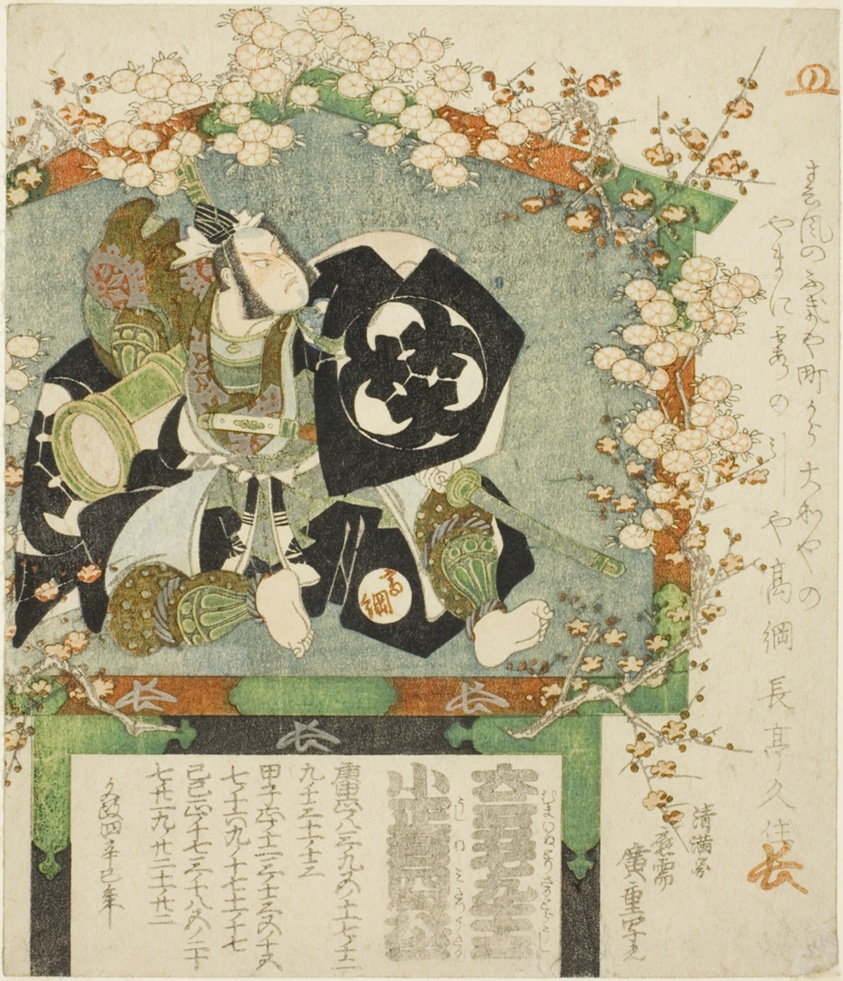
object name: Print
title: Votive plaque of the actor Bando Mitsugoro III as Sasaki Takatsuna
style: Japanese (culture or style)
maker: Utagawa Hiroshige 歌川 広重; Japanese, 1797-1858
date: 1821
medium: Color woodblock print; shikishiban, surimono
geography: Japan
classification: woodblock print; print; asian art